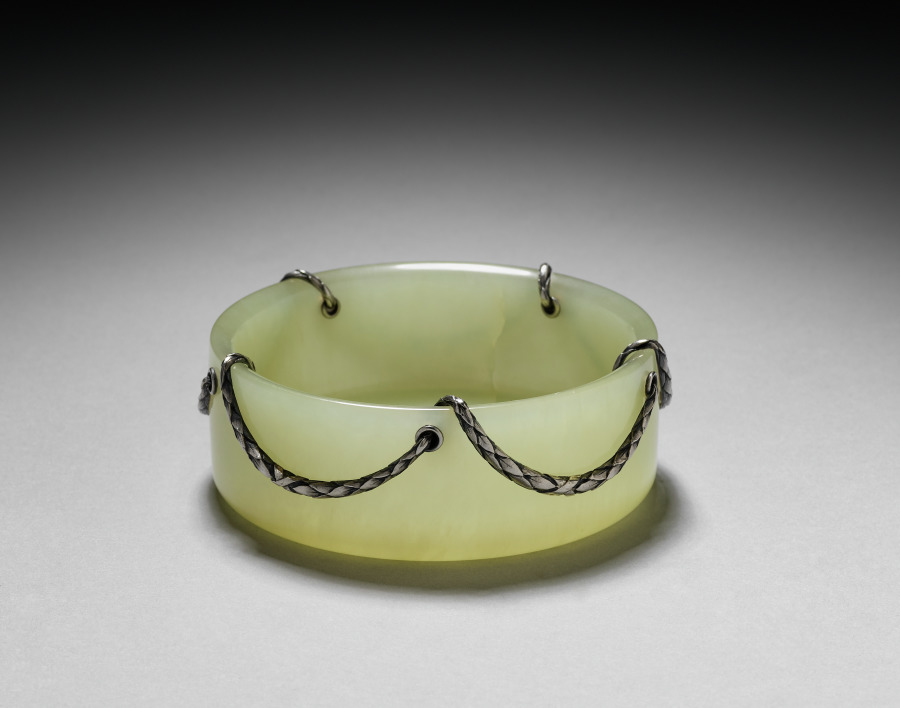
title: Dish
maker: House of Fabergé (Russian, 1842–1918)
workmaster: Hjalmar Armfelt (Finnish, 1873–1959)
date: c. 1904–16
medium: bowenite, silver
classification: Silver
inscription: Impressed mark: 88, silver standard; initials for workmaster Karl Gustav Hjalmar Armfelt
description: The House of Fabergé specialized in the creation of little treasures intended as opulent personal gifts. In creating luxurious accessories for a desk or tabletop, Fabergé often used native hardstones such as multicolored agate and quartz, green nephrite, pink rhodonite, rock crystal, and pale green bowenite found in the Ural Mountains of western Russia. Fabergé's designers often paired hardstones with silver mounts, particularly in the Moscow workshop where the company's silversmiths were concentrated.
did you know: Sometimes called "new jade," bowenite is actually considered a semiprecious gemstone. Though Fabergé obtained his supply from the Ural Mountains of Russia, bowenite is also the state mineral of Rhode Island.